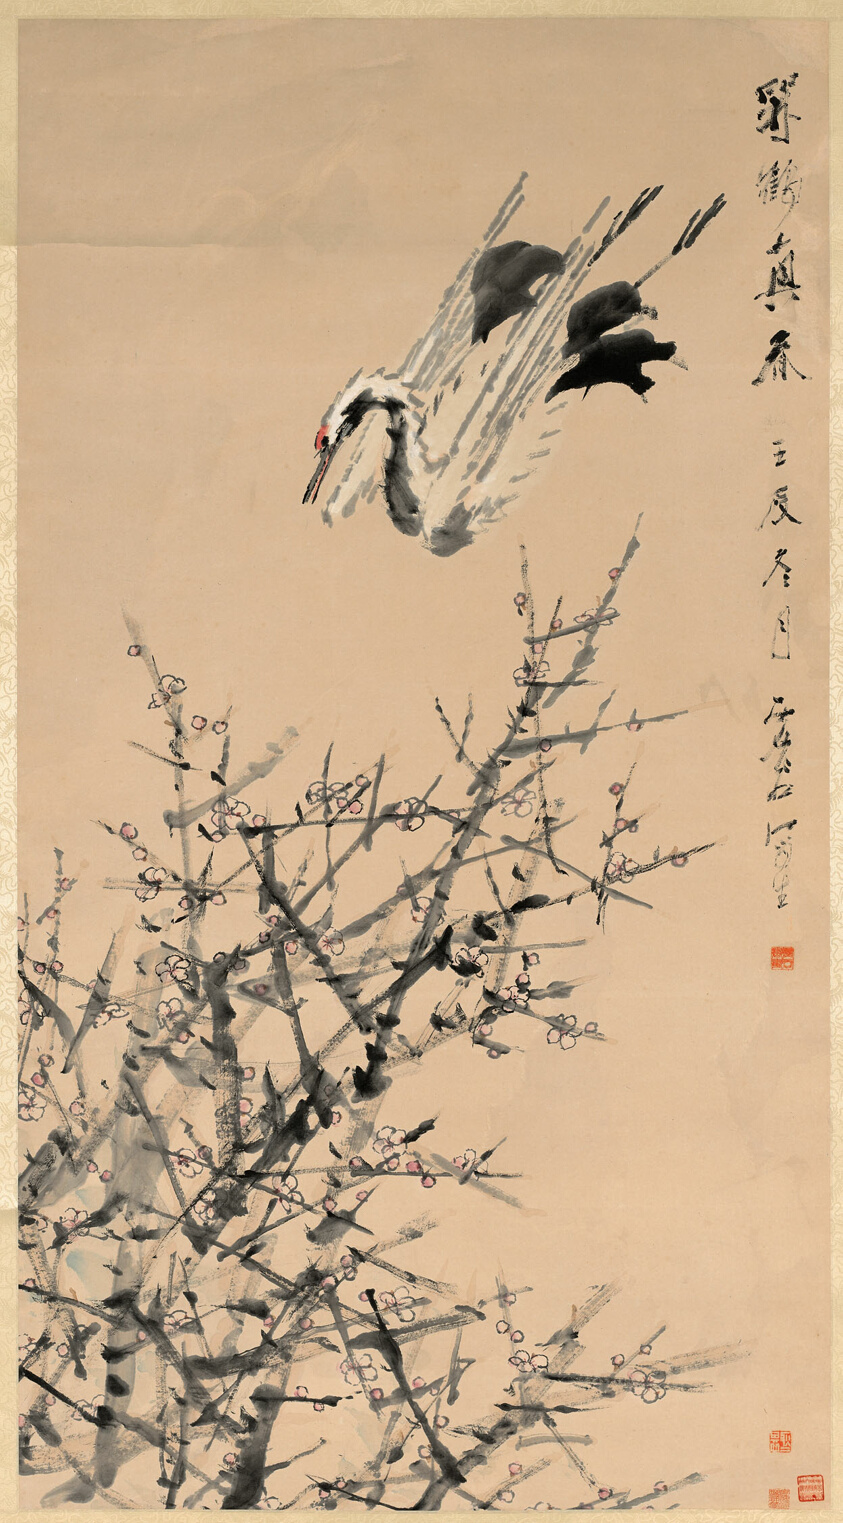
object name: Painting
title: Plum Blossoms, Crane, and Spring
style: Chinese (culture or style)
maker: Xugu (Chinese, 1824-1896)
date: Qing dynasty ( 1644–1912); 1824–1896; c.1892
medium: Hanging scroll; ink and colors on paper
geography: China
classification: painting; asian art